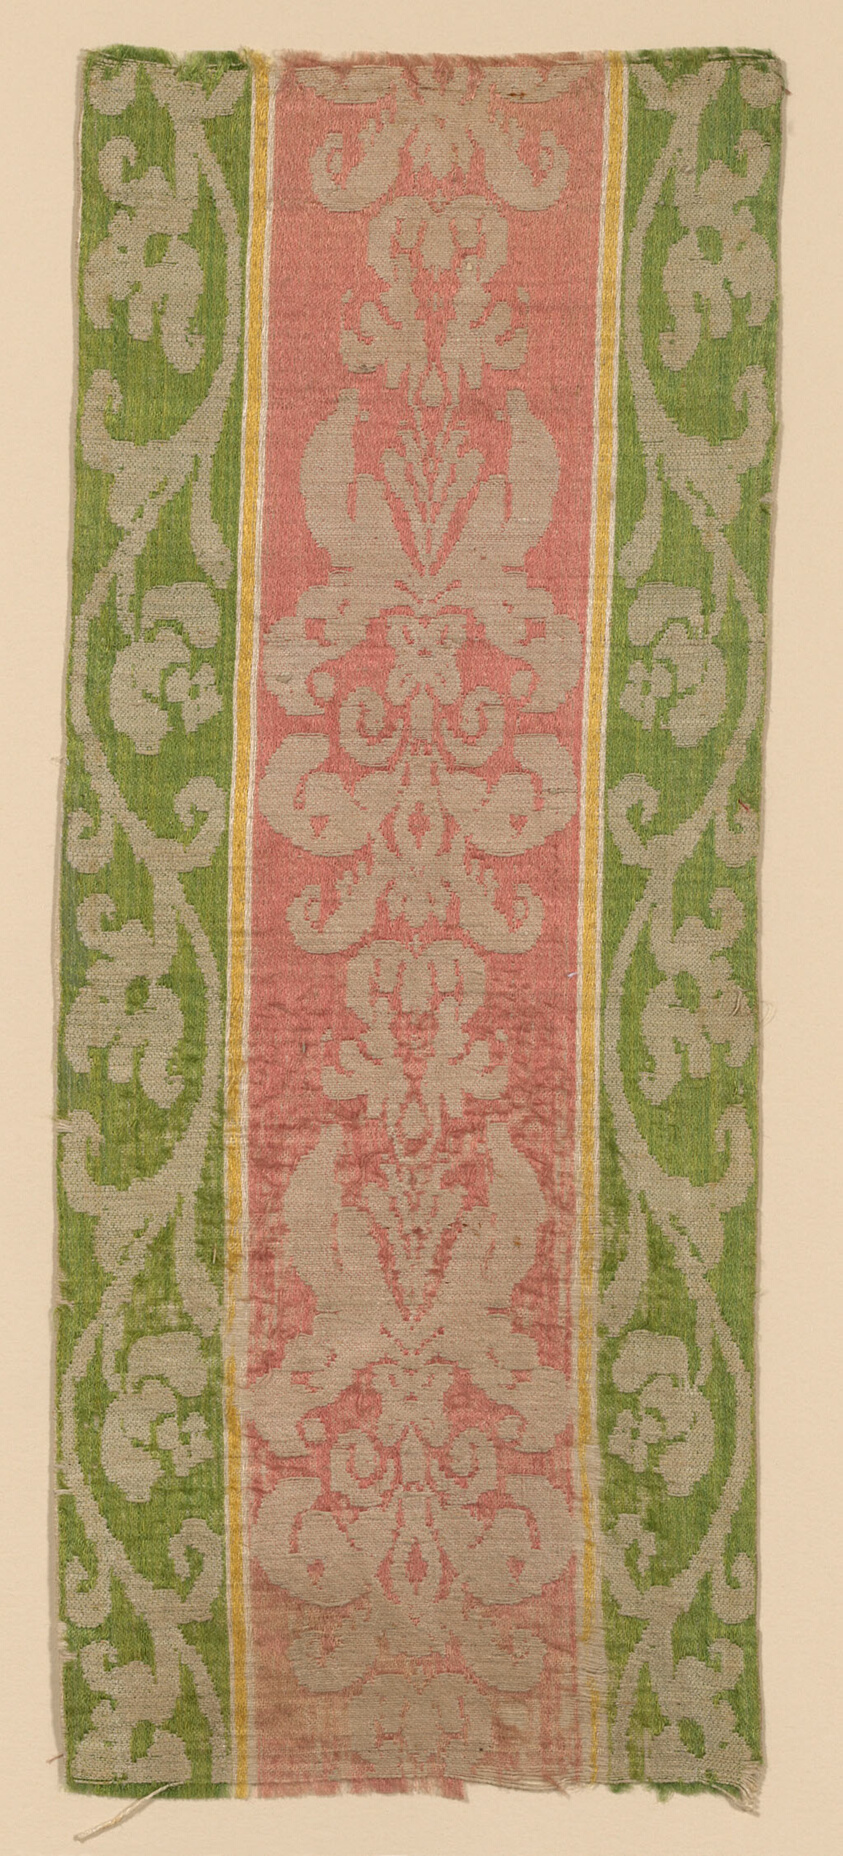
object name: Textile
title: Fragment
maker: Netherlands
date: 17th century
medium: Silk and linen; brocaded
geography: Netherlands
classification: textile; weaving